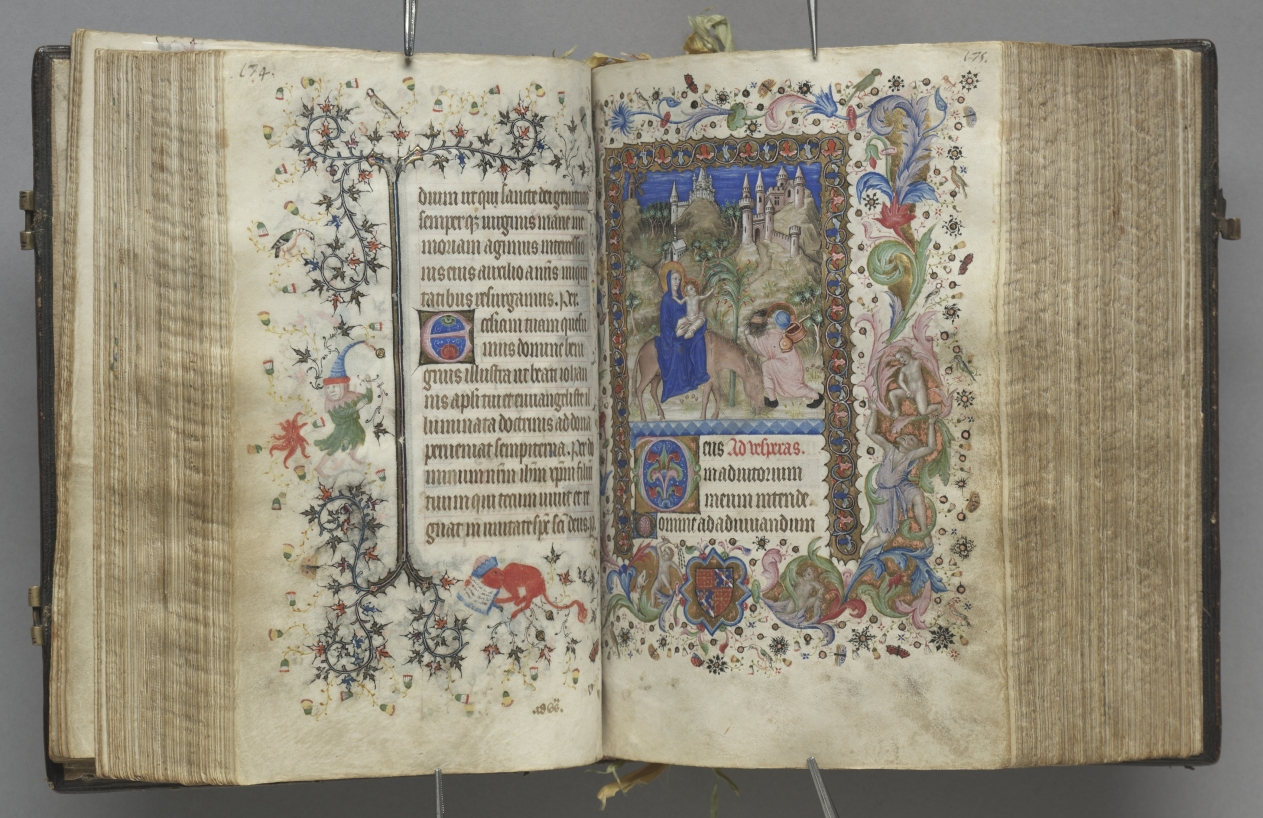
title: Hours of Charles the Noble, King of Navarre (1361-1425): fol. 87v, Text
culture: France, Paris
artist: Master of the Brussels Initials and Associates (French)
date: c. 1405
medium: ink, tempera, and gold on vellum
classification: Bound Volume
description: This precious volume was obviously highly prized by its owner, the French-born King of Navarre, who had his coat of arms painted on no less than twenty folios. Rather than directly commissioning this manuscript from a specific workshop, it seems that Charles the Noble acquired his book of hours -- perhaps ready-made for the luxury market -- while on a trip to Paris in 1404-05. A collaborative effort, six painting styles are evidenced within the pages of this codex, those of two Italians, two Frenchmen, and two Netherlanders. The painter who was responsible for the planning and decoration of the book, and who produced seventeen of the large miniatures, was a Bolognese artist known as the Master of the Brussels Initials. His principal assistant, responsible for most of the borders, was a Florentine who signed his name "Zecho" da Firenze on folio 208 verso.